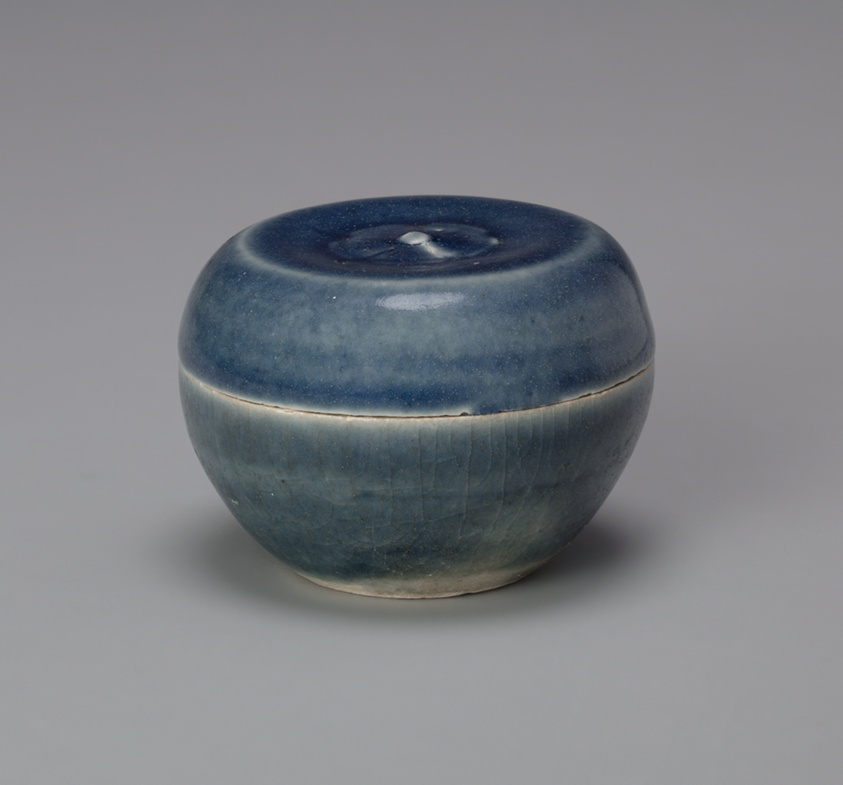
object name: Vessel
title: Miniature Covered Box with Knob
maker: Vietnam, near Hoi An, Offshore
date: Late 15th/early 16th century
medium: Glazed stoneware with cobalt-blue underglaze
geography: Vietnam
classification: miniature; vessel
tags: blue (color)